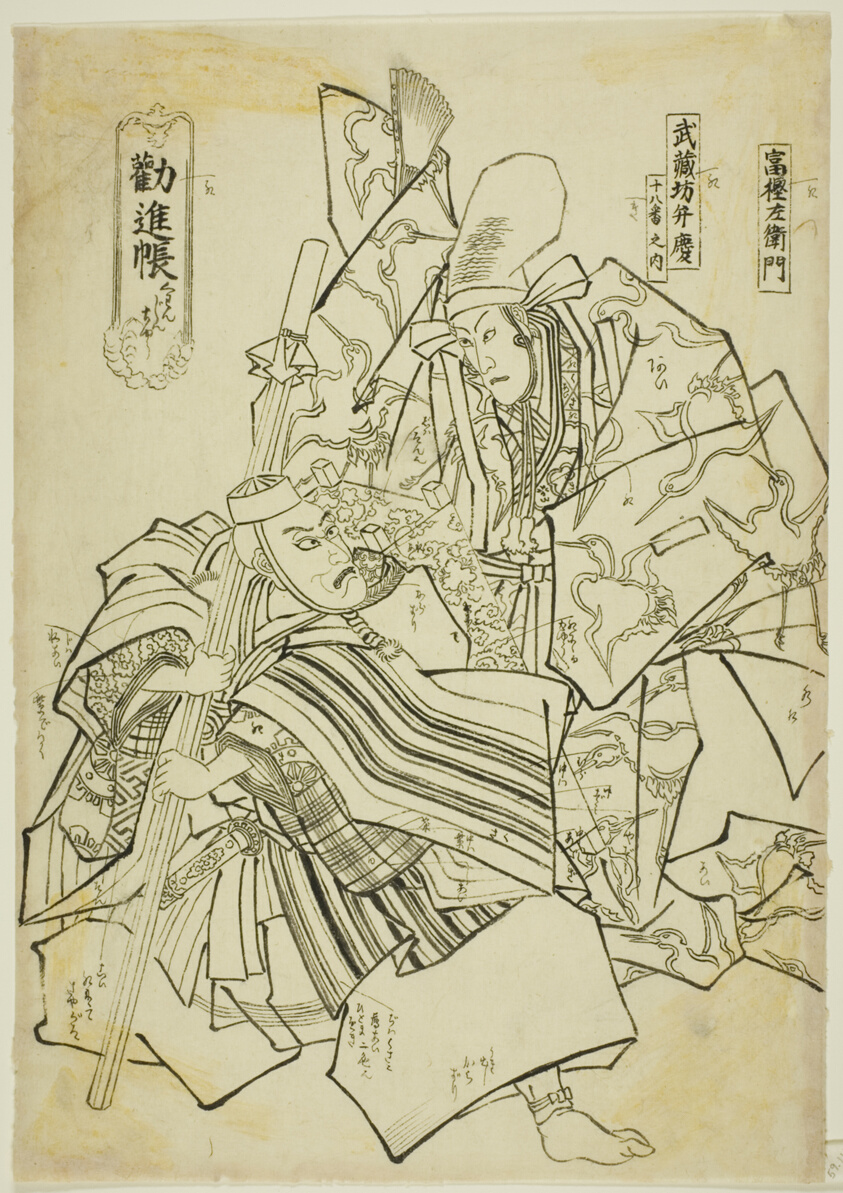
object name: Drawing and Watercolor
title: Ichikawa Ebizô V as Togashi Saemon and Ichikawa Danjûrô VIII as Musashibô Benkei in Kanjinchô (The Subscription List), plate 18 from the series Eighteen Great Kabuki Plays (Jûhachiban no uchi)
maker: Attributed to Utagawa Kunisada; Japanese, 1786-1864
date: About 1852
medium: Ink on paper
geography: Japan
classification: woodblock print; print; asian art